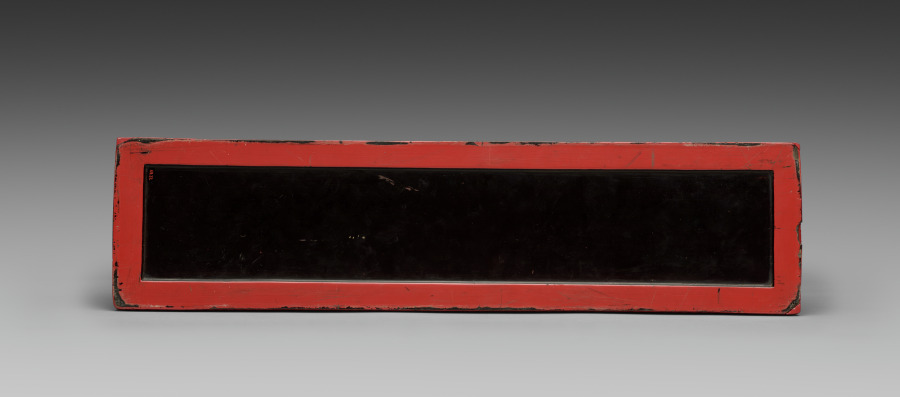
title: Base for a Carved Lacquer Scroll Box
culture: China, Qing dynasty (1644–1911), Qianlong reign (1736–95)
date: 1736–95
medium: cinnabar carved lacquer on wood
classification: Lacquer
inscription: 心寫治平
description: The elaborate design, superior craftsmanship, and inscription carved into the red cinnabar lacquer proclaim the imperial pedigree of this scroll box. On either end appears a five-clawed dragon, a design reserved only for an emperor. More dragons twist and wind through swirling clouds and waves along the length of the box’s sides and top. The carving is intricate and vigorous, while the design is controlled and regular. This box originally housed the handscroll, CMA 1969.31, private portraits of the Emperor Qianlong, his empress, and 11 other favorites among his presumed 40 or more wives during his 60-year reign.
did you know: This is the original box for the handscroll Portraits of the Qianlong Emperor and His Twelve Consorts, CMA 1969.31.